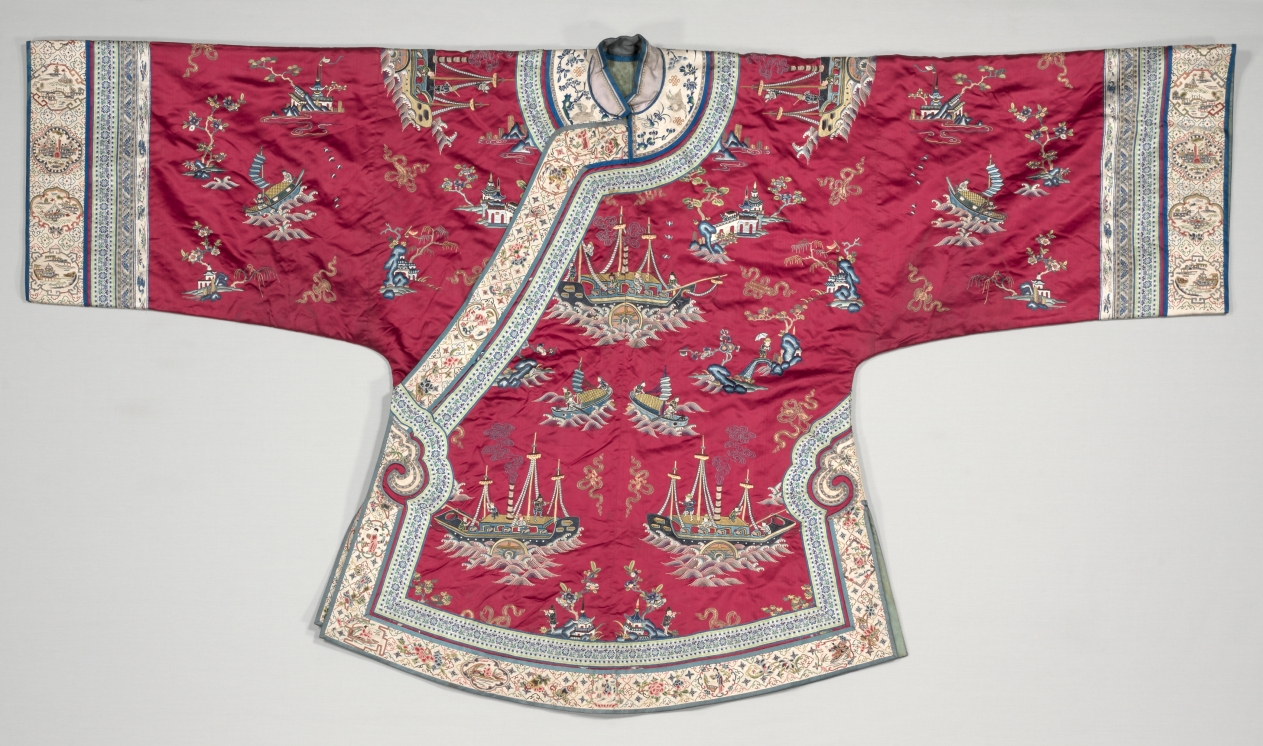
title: Coat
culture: China, Qing dynasty (1644–1911)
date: late 1880s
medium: Silk, gold thread: embroidery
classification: Garment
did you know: This was likely made for a wife of a wealthy merchant, whose business would rely on ships like the embroidered ones on the coat.